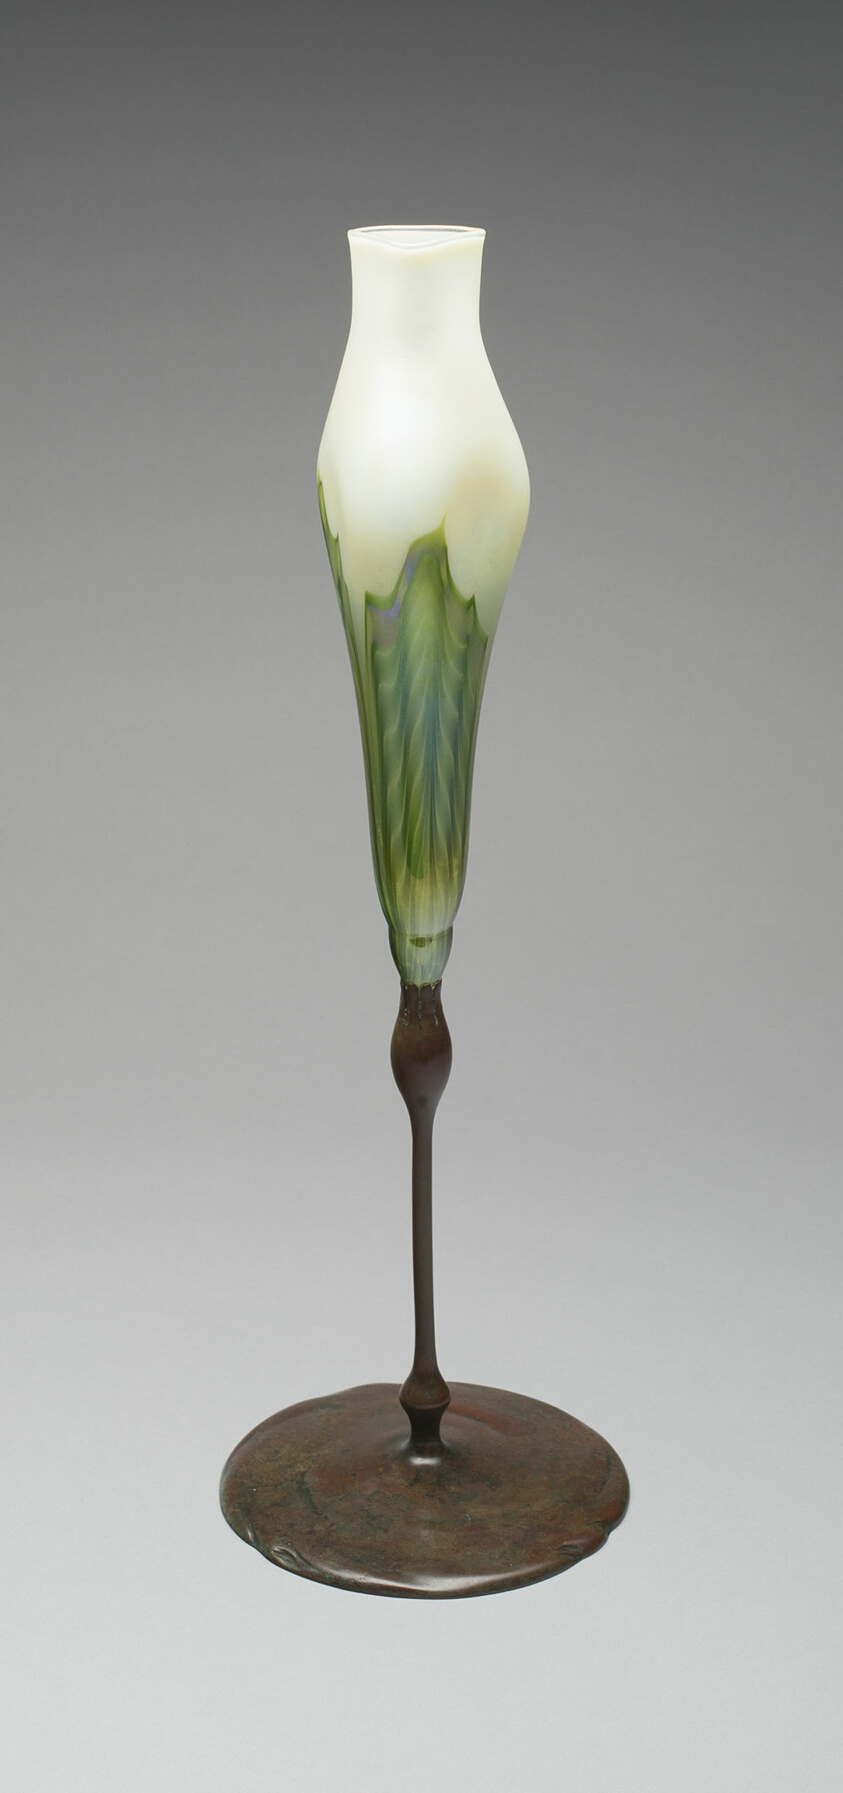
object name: Glass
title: Vase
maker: Tiffany Glass and Decorating Company (American, 1894–1902); or Tiffany Studios (American, 1902–32); Corona, New York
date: 1898–1902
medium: Glass and bronze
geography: Corona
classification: vase; glass; american decorative arts; american arts; decorative arts